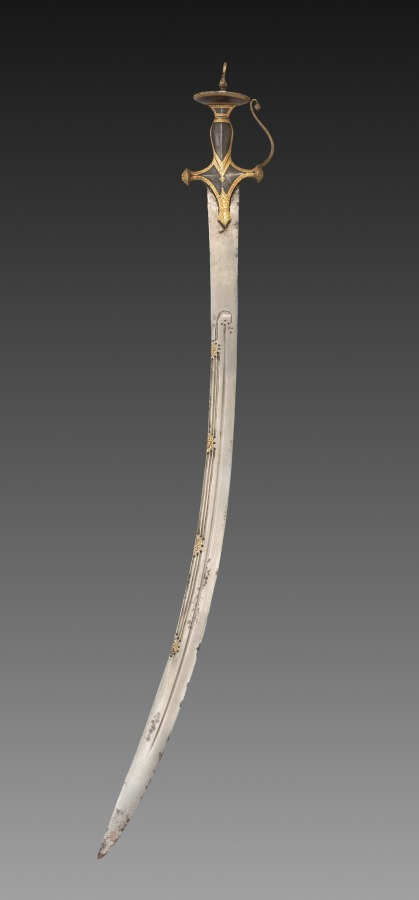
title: Silapa Sword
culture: India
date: 1700s–1800s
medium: gold with inlay and leather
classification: Arms and Armor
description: The exceptionally thin, curved blade is made of watered steel. The grooves, called fullers, allowed for weight reduction and prevented flexion. The costly hilt is fully overlaid with brass in steel, both inside and outside the knuckle.